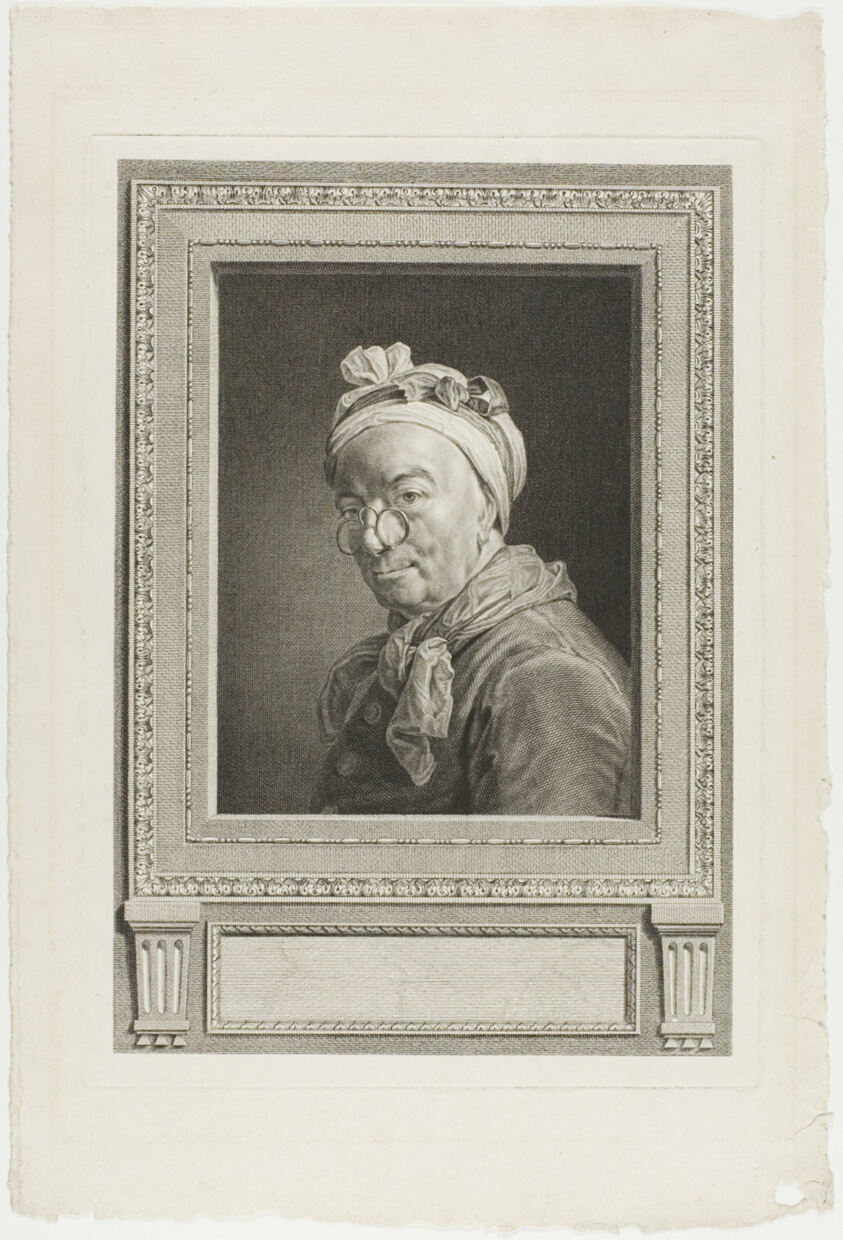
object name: Print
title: Self-Portrait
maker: Juste Chevillet (German, 1729-1790); after Jean-Siméon Chardin (French, 1699-1779)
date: before 1780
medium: Engraving on ivory laid paper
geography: Germany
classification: engraving; paper; print; prints and drawing